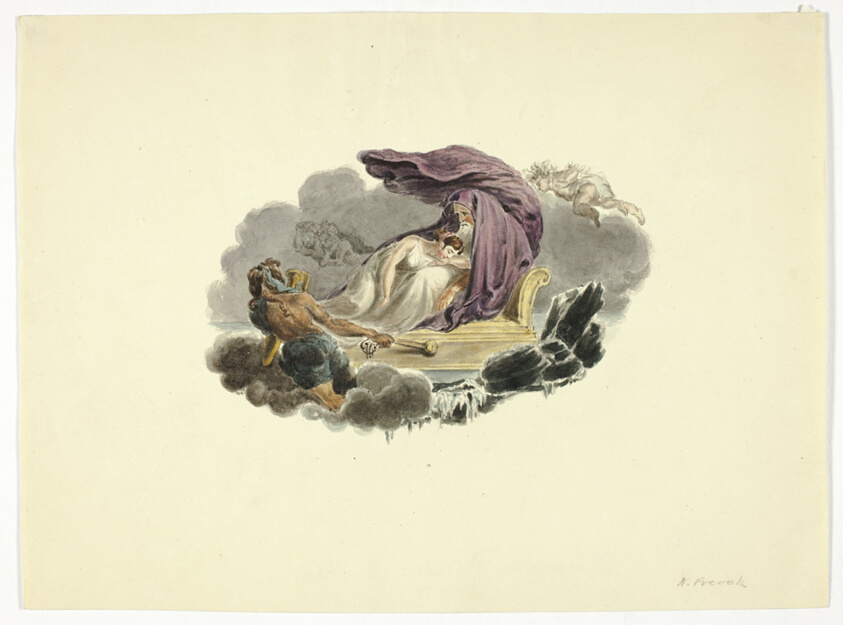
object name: Drawing and Watercolor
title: Mythological Scene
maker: Attributed to Nicholas Pocock; English, 1740-1821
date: 1760-1821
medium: Watercolor, over traces of graphite, on cream wove paper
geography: England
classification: watercolor; drawings (visual works); prints and drawing